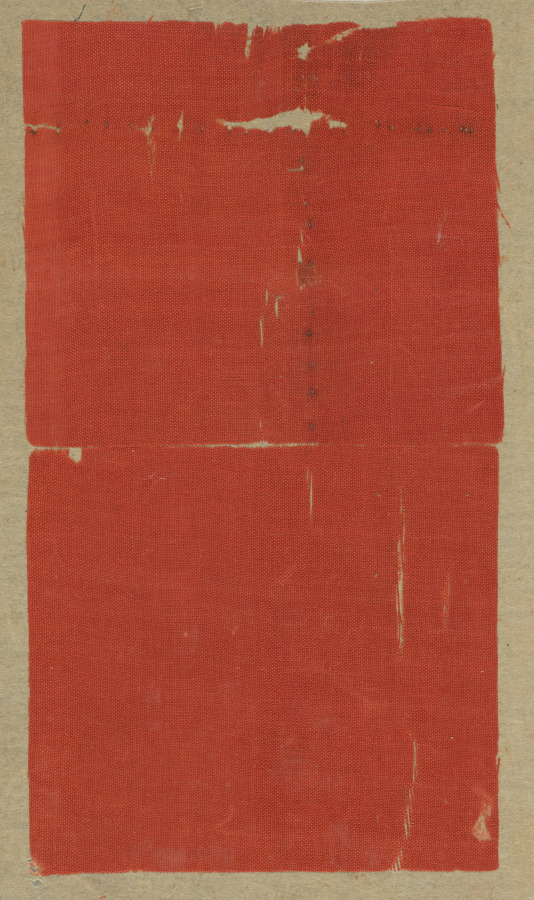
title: Two Fragments Mounted as One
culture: China or Japan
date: 700s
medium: tabby weave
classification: Textile